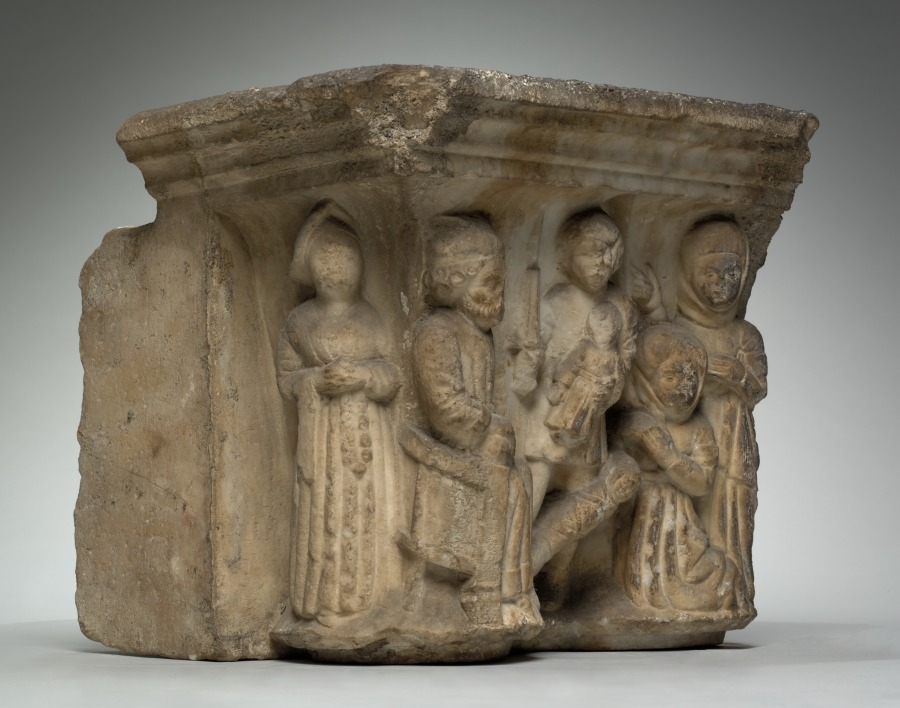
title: Engaged Capital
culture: Southern France, Abbey of Larreule, near Tarbes, 15th century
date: 1400s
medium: limestone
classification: Sculpture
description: This capital belongs to a surviving group including other architectural fragments that once decorated the cloister of the Abbey of Larreule. A cloister was a covered walkway or arcade, usually around all four sides of a square area of grass (the "cloister garth"). The seclusion of the cloister was the monks’ exclusive domain, off limits to others. Here, the monks were supposed to pray, study, meditate, and exercise in privacy and solitude. Such cloister capitals served both to instruct the monks and as a focus for their devotions. Other capitals in this series are installed in the Jardin Massey at Tarbes, near the original abbey. An arch from Larreule has been assembled with other associated French capitals at The Cloisters in New York.